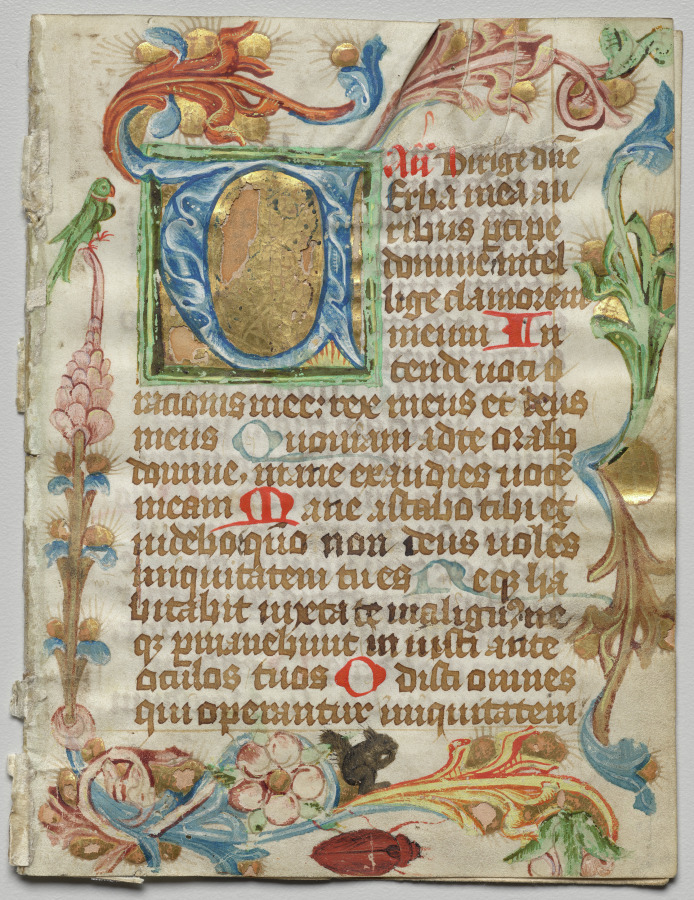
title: Bifolio from a Book of Hours: Initial V with Floral Border (recto)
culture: Austria (? ) or Bohemia (?), 15th century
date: c. 1460–1500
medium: ink, tempera and gold on vellum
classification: Manuscript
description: The word dirge, today meaning a mournful hymn for funerals, comes from the opening Latin in the Office of the Dead, seen just after the decorative letter A at upper left. During the Middle Ages, dirge became the shortened way to refer to the Office of the Dead. Although primarily recited at funerals, the office was also prayed at home as a reminder of mortality and a protection against sudden death. Surrounding the text, which contains Psalm 5, is a border decoration of acanthus leaves, believed to grow in paradise, as well as a parrot, a squirrel, a beetle, and flowers.